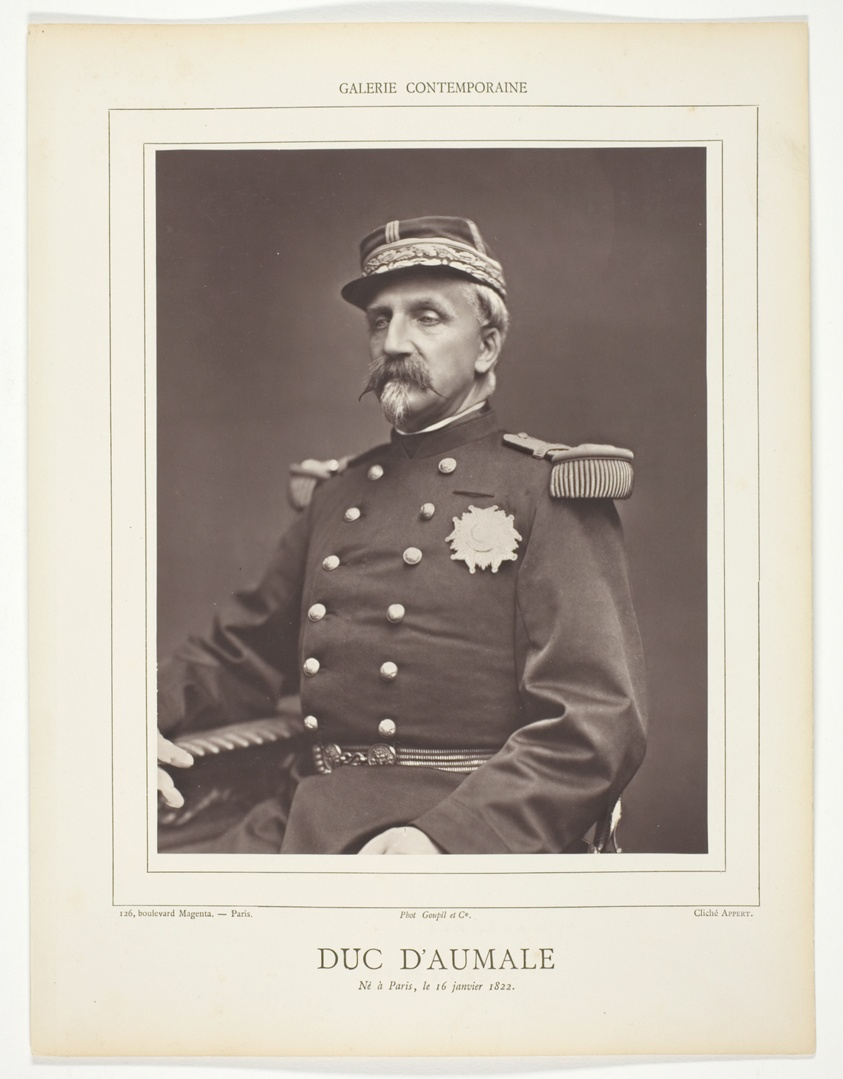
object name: Photograph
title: Duc D'amuale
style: 19th century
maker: Appert (French, 19th century)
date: 1876/78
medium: Woodburytype, from the periodical “Galerie Contemporaine Littéraire, Artistique” (1878), volume 5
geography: France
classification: gelatin silver (developing-out-paper) pr; photographic process; photography; photograph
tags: Collected by Hugh Edwards, Paris, Contemporaine Littéraire